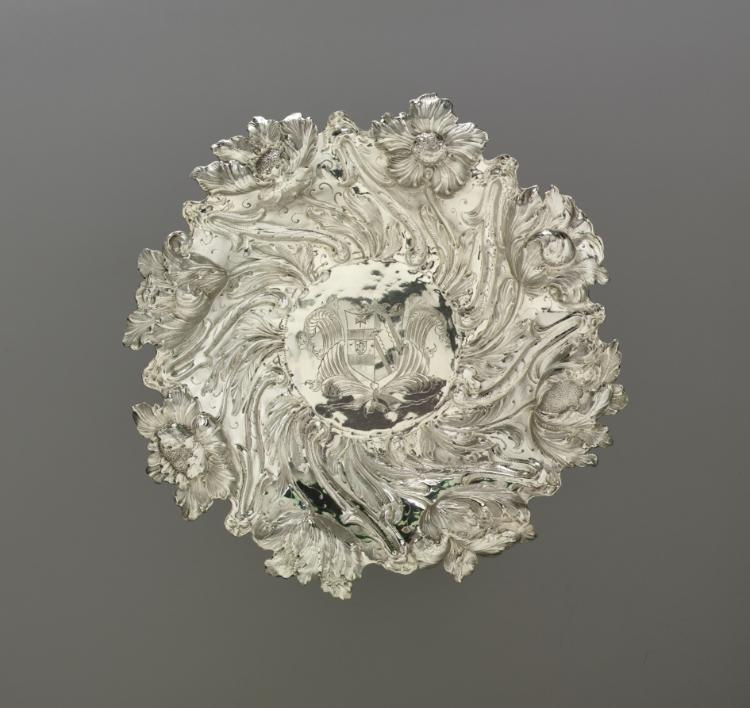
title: Dish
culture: England, London, 17th century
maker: WW (British)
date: 1673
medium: silver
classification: Silver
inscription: Engraved with arms of Holte impaling Clobery (the arms of Sir Charles Holte (1648–1722), the 3rd Baronet of Warwickshire, and his wife Anne Clobery (1664–c. 1738) of Bradstone)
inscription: “WW”; possibly hallmark of William Wheeler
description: Silver fulfilled a prominent role in projecting wealth, status, power, and ritual in British life during the 1600s and 1700s. Elaborate forms such this shallow dish not only represented wealth in its sheer silver weight but also provided royal and aristocratic owners a surface for displaying engraved coats of arms. For example, this dish is engraved with the arms of Sir Charles Holte (1648–1722), the 3rd Baronet of Warwickshire, and his wife Anne Clobery (1664–c. 1738) of Bradstone, Hampshire, along the southern coast of England.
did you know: A scalloped rim and raised depictions of flowering poppies on this plate suggest that it was likely intended to be displayed on a sideboard rather than used as part of a table service.